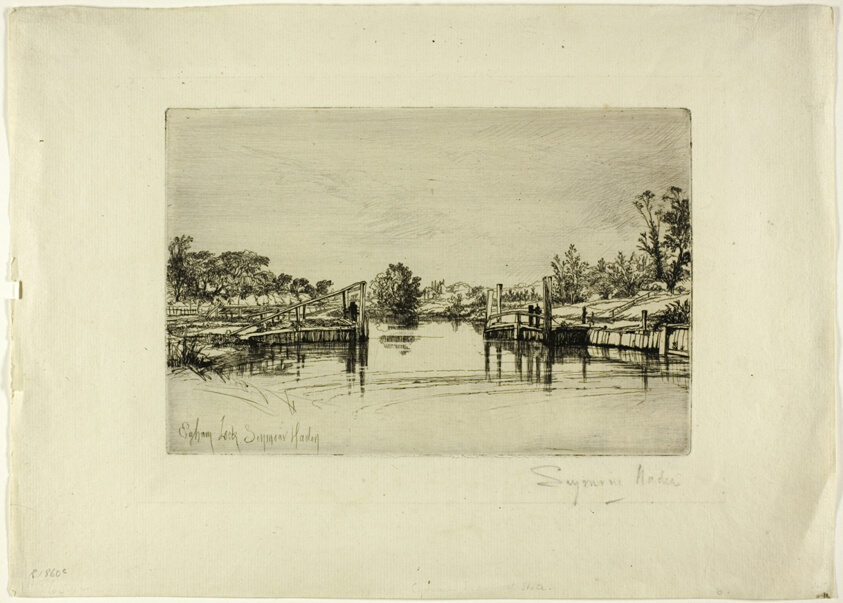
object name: Print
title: Egham Lock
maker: Francis Seymour Haden (English, 1818-1910)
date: c. 1859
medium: Etching and drypoint on cream laid paper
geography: England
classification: etching; print; prints and drawing